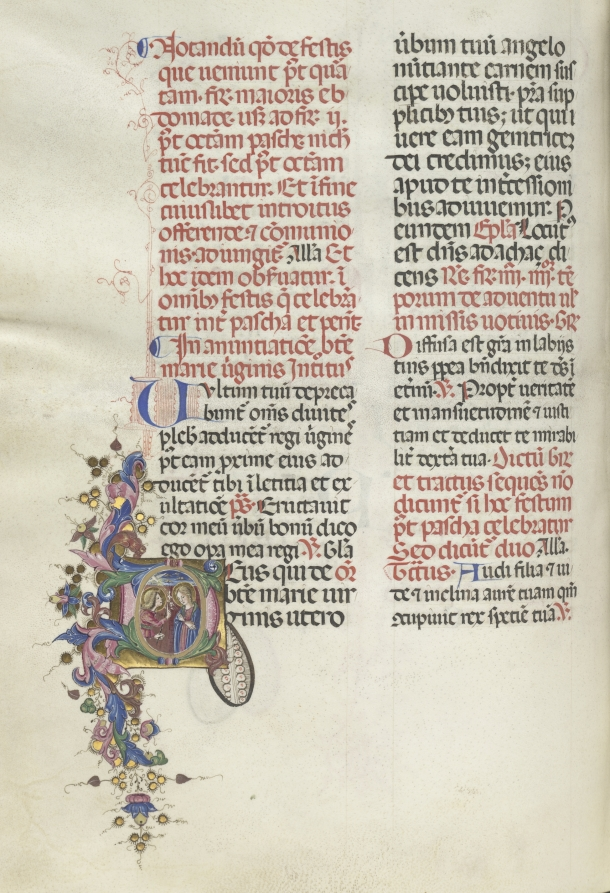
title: Missale: Fol. 275v: Annunciation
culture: Italy, Perugia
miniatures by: Bartolommeo Caporali (Italian, c. 1420–1503)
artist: assisted by Giapeco Caporali (Italian, d. 1478)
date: 1469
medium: ink, tempera and burnished gold on vellum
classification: Bound Volume